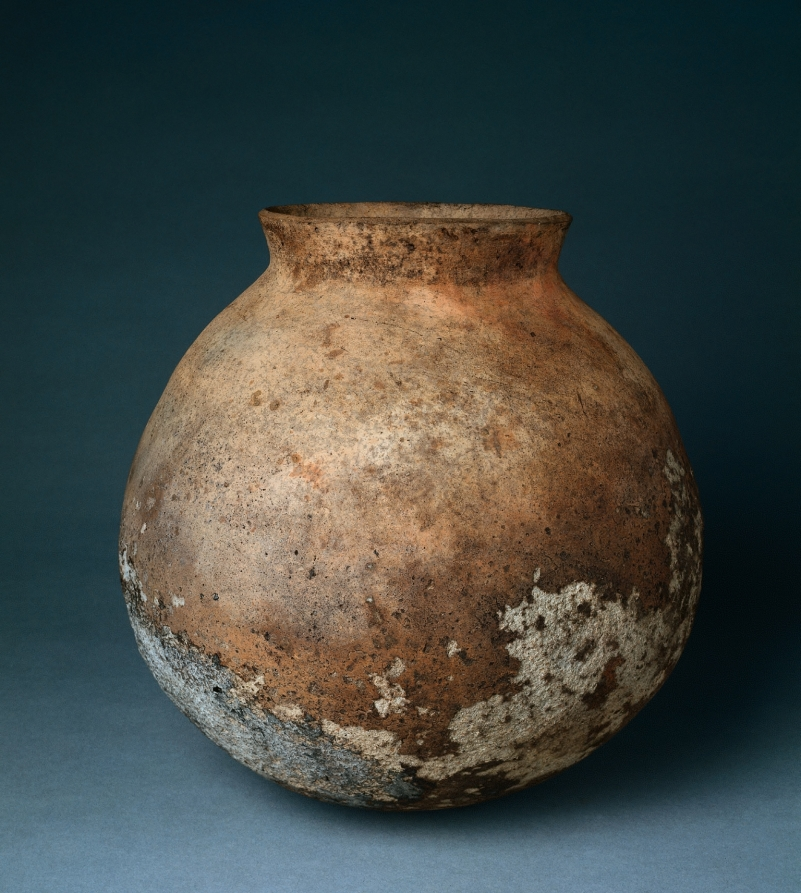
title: Short-necked Storage Jar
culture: Korea, Bronze Age (1000–300 BCE)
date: 600s–300s BCE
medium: earthenware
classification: Ceramic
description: A large quantity of pottery such as this earthenware jar was produced during the Bronze Age in Korea, as farming became more commonly practiced. Large jars made of fine clay were used to stored grains and later were buried in in tombs to accompany the tomb owner. It was during this time that a substantial number of Korean farmers migrated to the western Japanese archipelago and introduced advanced rice farming and pottery-making techniques.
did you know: A large quantity of clay pottery to store food such as this work excavated from ancient sites indicate the advanced development of agriculture in the Korean peninsula during the Bronze Age.